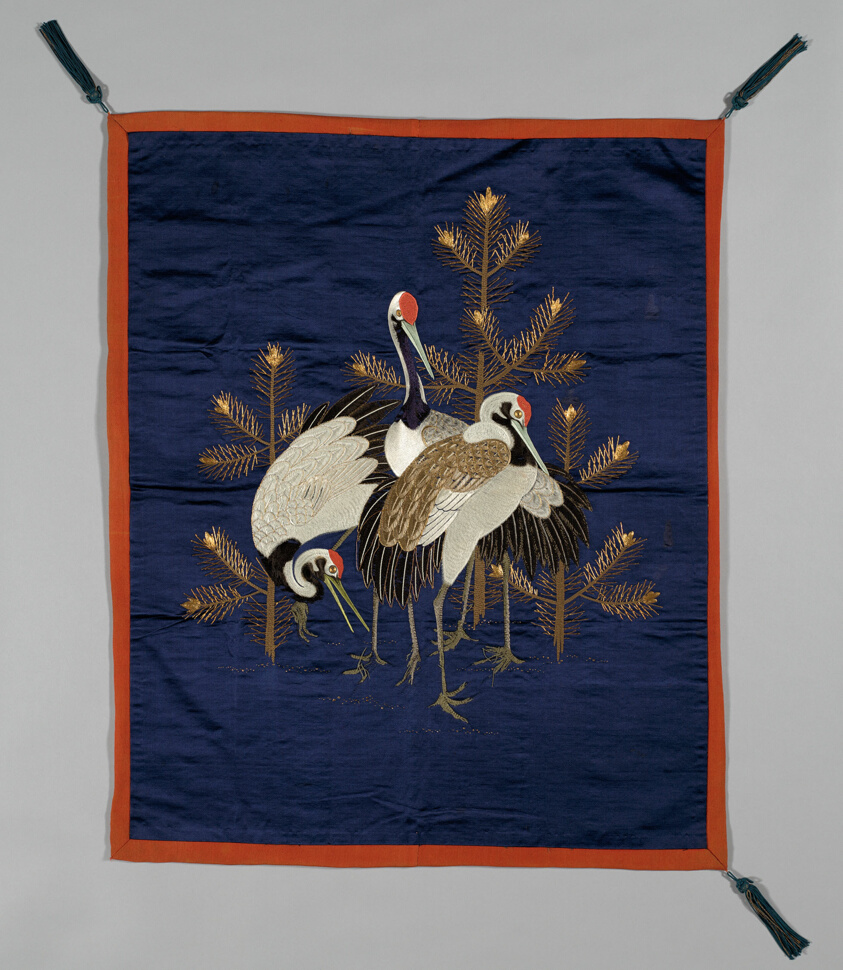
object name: Textile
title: Fukusa (Gift Cover)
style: meiji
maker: Japan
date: Meiji period (1868–1912), late 19th century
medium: Embroidered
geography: Japan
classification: textile; weaving; liturgical - buddhist